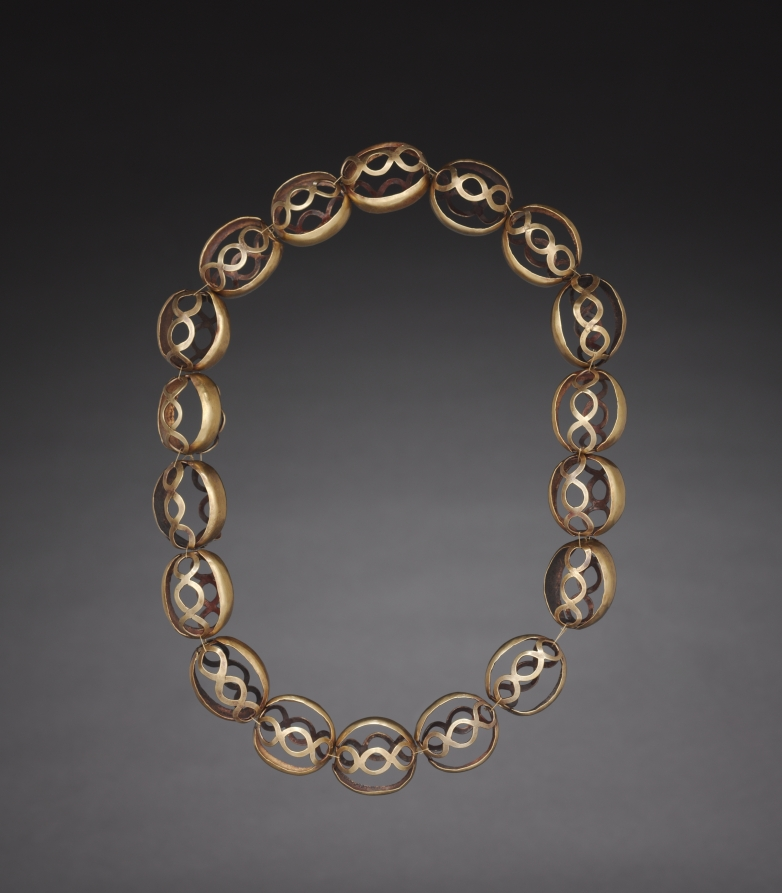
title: Necklace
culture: Peru, North Highlands, Chavín de Huantar(?), Chavín style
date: c. 500–200 BCE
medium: hammered and cut gold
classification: Metalwork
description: There seems to be a link between Chavín religion and appearance of the Andes’ first large precious-metal objects, made using revolutionary new metallurgical processes. Chavín may have developed these technical innovations to express the inexpressible, the "wholly other" nature of its religion. In many areas, elite men and women wore the ornaments as emblems of their ties to this religion, and eventually were buried with them. These 16 objects, along with three others not in the museum’s collection, are said to have come as a group from Chavín itself.